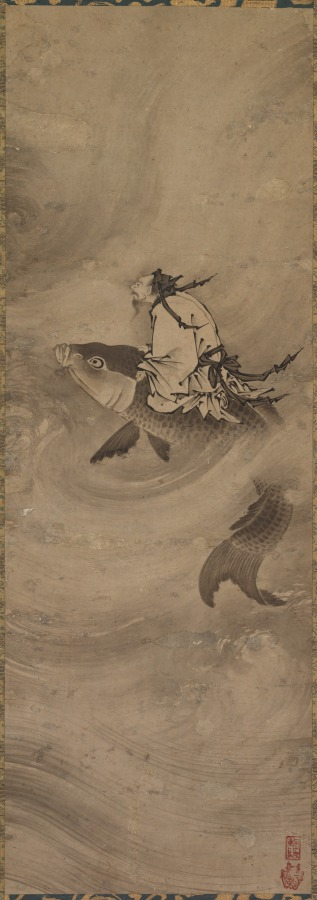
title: Immortal Riding on a Carp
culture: Japan, Edo period (1615–1868)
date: c. 1600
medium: hanging scroll; ink on paper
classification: Painting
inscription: seal of Motonobu ?